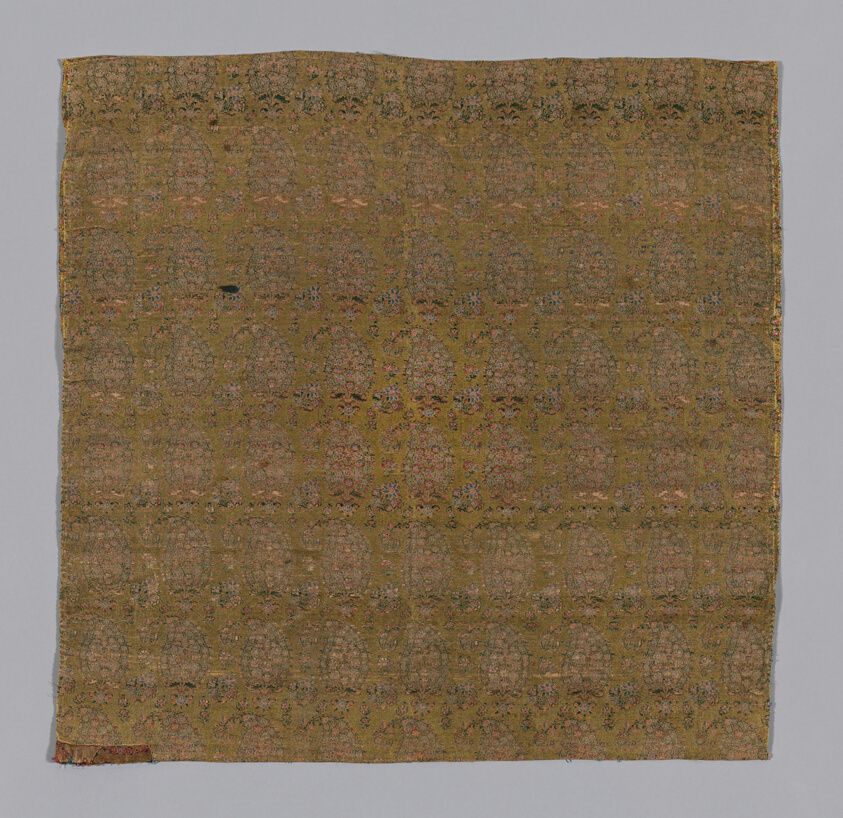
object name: Textile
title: Panel (Furnishing Fabric)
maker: Iran (Persia)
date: 1801/25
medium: Silk, compound weave, with flowering tree motif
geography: Iran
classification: textile; weaving; furnishing textile